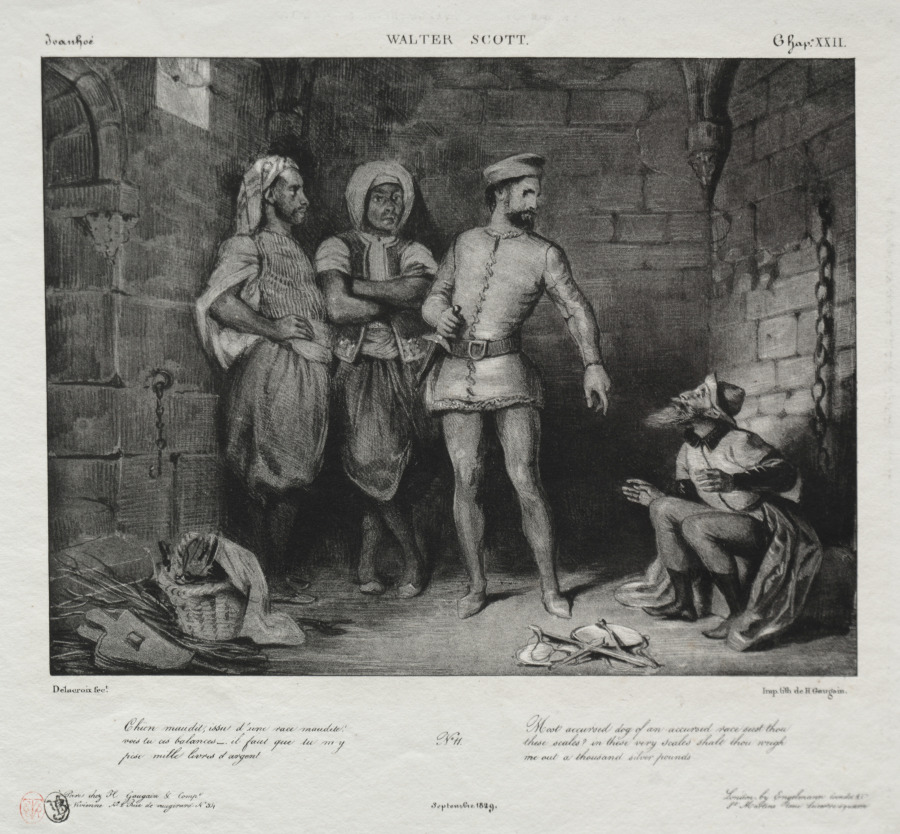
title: Fronte-Boeuf and the Jew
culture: France, 19th century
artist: Eugène Delacroix (French, 1798–1863)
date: 1829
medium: lithograph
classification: Print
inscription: upper margin, printed: Ivanhoe / Walter Scott / Chap XXII / lower margin, printed: Delacroix fect. / lImp. lith de H. Gaugain / à Paris chez H. Gaugain & Compe / rue Vivienne No. 2 et rue vaccginard No. 34 / September 1829 / London by Engelmann Coundet & Cie. / St. Martins Lane Leicestre Square